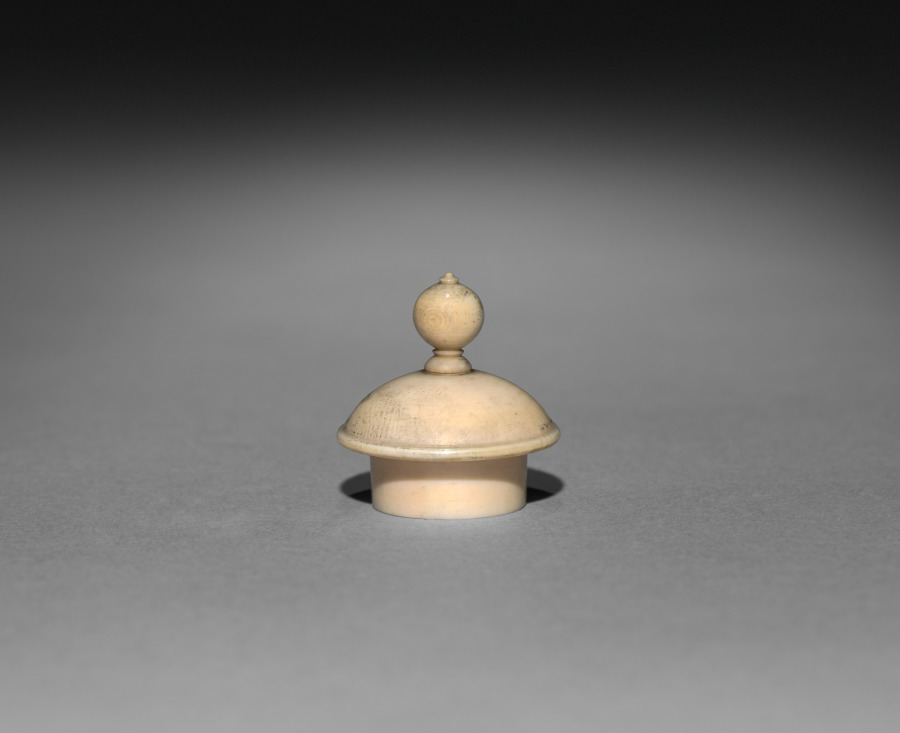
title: Snuff Bottle (stopper)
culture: China, Qing dynasty (1644-1911)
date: 1644–1911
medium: glass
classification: Glass